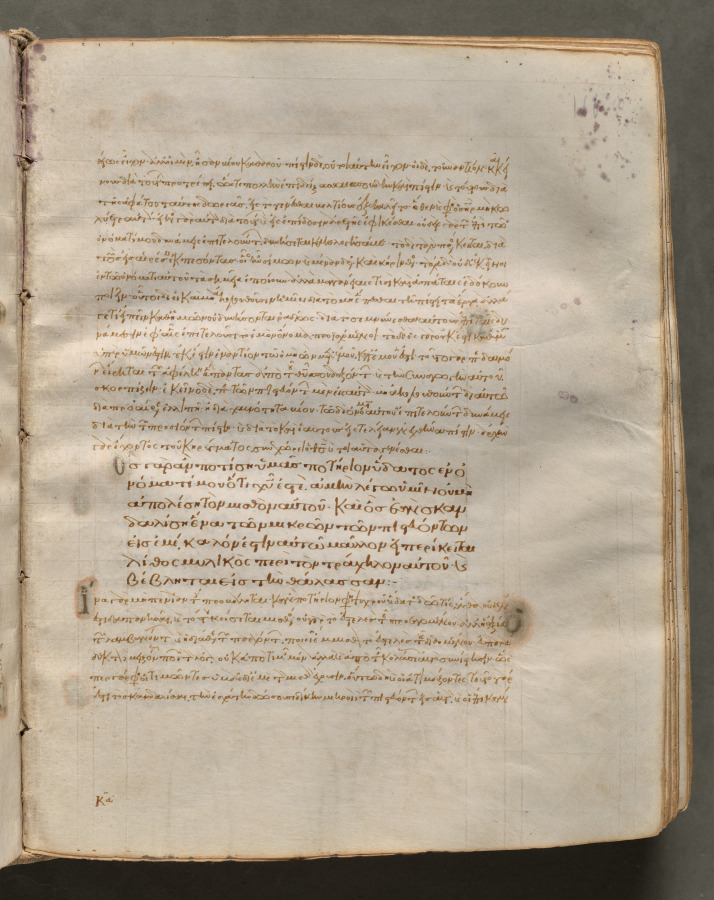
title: Text, folio 166 (recto), from a Gospel Book with Commentaries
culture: Byzantium, Constantinople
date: c. 1000–1100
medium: ink, tempera, and gold on vellum; leather binding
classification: Bound Volume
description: Each of the four gospels in this book opens on a page with brilliantly illuminated borders depicting the author of the text as well as birds-principally peacocks, symbols of the immortality of the soul-and fountains, representing the fountain of life and the salvation of the soul. This volume consists of 428 leaves with texts in Greek. Its level of sophistication suggests that it was probably written and decorated in a monastery in Constantinople.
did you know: Gospel Books were carried in procession through Byzantine churches.